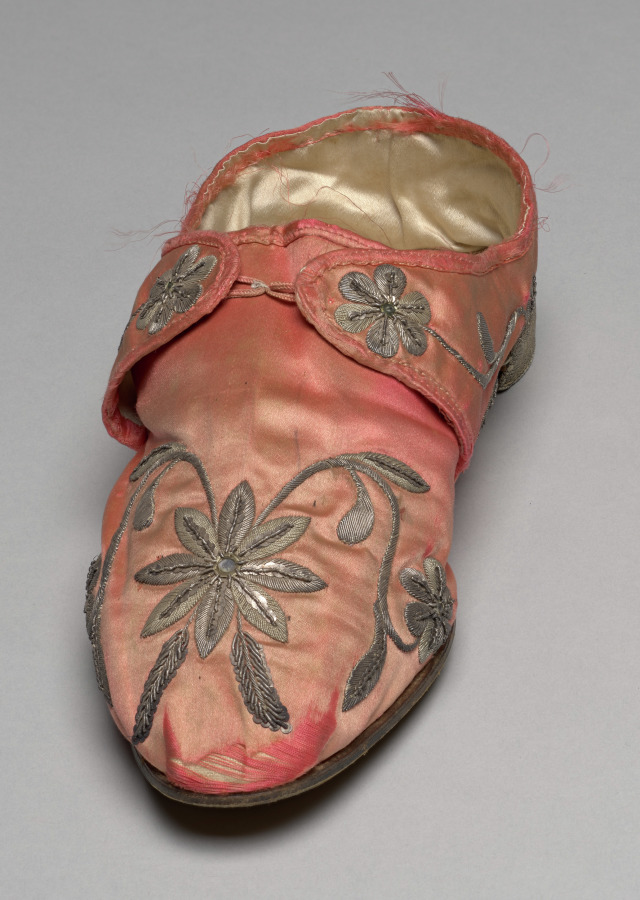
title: Slipper (one of a pair)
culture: Italy, Venice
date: early 1700s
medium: Silk: satin weave with silver metal thread embroidery and trim; spangles; leather soles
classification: Garment